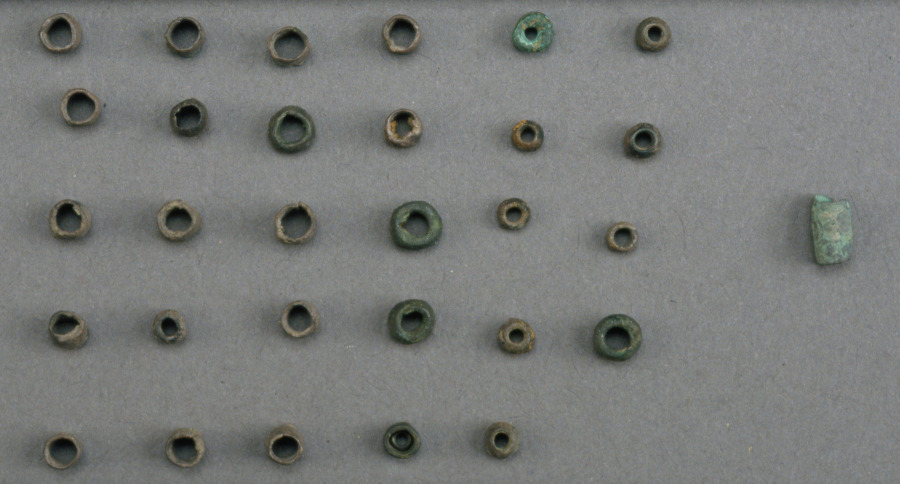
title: Medallion, beads, and spindle whorls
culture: Central Andes, North Coast, Chimú (medallion)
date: 1000–1532 (medallion)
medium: bronze, copper, silver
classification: Jewelry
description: This medallion and dozens of smaller beads and spindle whorls arrived at the museum strung on modern cord. Pierced with a hole at the top, it could have been suspended from a necklace or attached to a backing, such as a textile. It comes from Peru’s north coast and was made in the late pre-Hispanic period; the dates of the smaller beads are less clear.